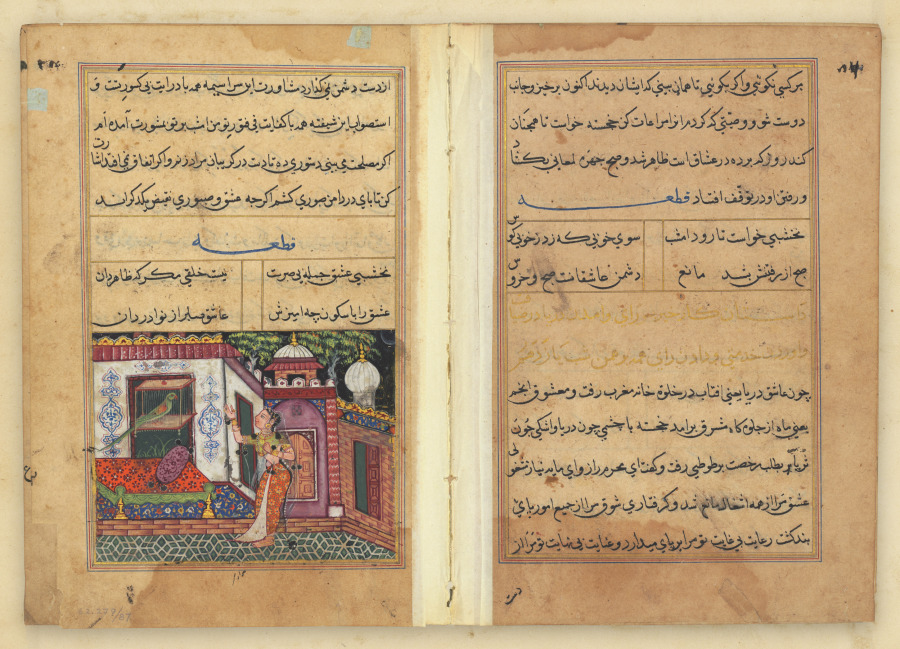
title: Tuti-Nama (Tales of a Parrot)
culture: Mughal India, court of Akbar (reigned 1556–1605)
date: c. 1560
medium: gum tempera, ink, and gold on paper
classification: Painting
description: The Tuti-Nama, written in Persian in the early fourteenth century, contains a series of fifty-two moralizing tales told by a clever, talking parrot. Each story is intended to instruct Khujasta and distract her from an adulterous affair. The Cleveland Museum of Art’s copy of the manuscript was painted for Emperor Akbar (r. 1556–1605) and represents the origins of Mughal painting.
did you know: Another Akbari Tuti-Nama, painted in the 1580s, is held in Dublin’s Chester Beatty Library.